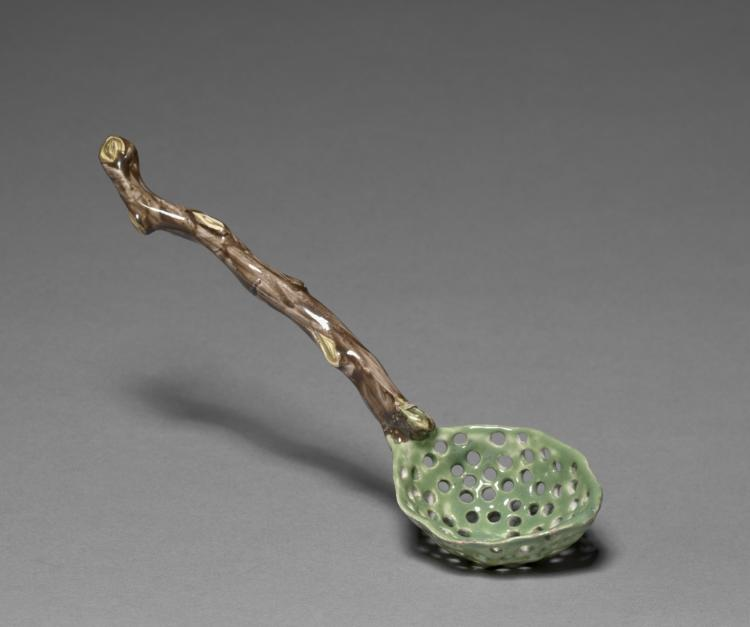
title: Sugar Spoon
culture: France, Marseilles, mid-18th century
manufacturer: Veuve Perrin Factory (French)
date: c. 1760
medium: tin-glazed earthenware (faience) with enamel decoration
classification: Ceramic